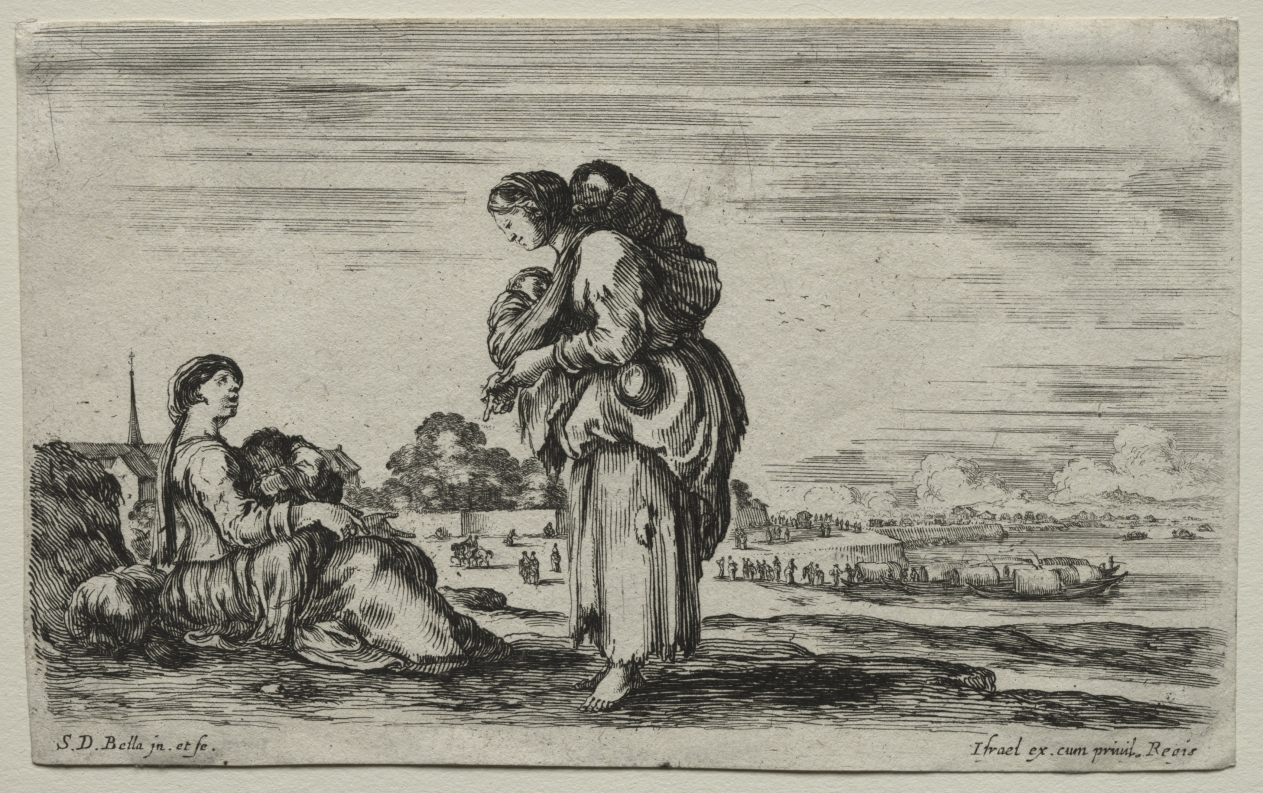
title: Various Figures and Landscapes: Two Mothers Chatting Together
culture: Italy, 17th century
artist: Stefano Della Bella (Italian, 1610–1664)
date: 1649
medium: etching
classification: Print